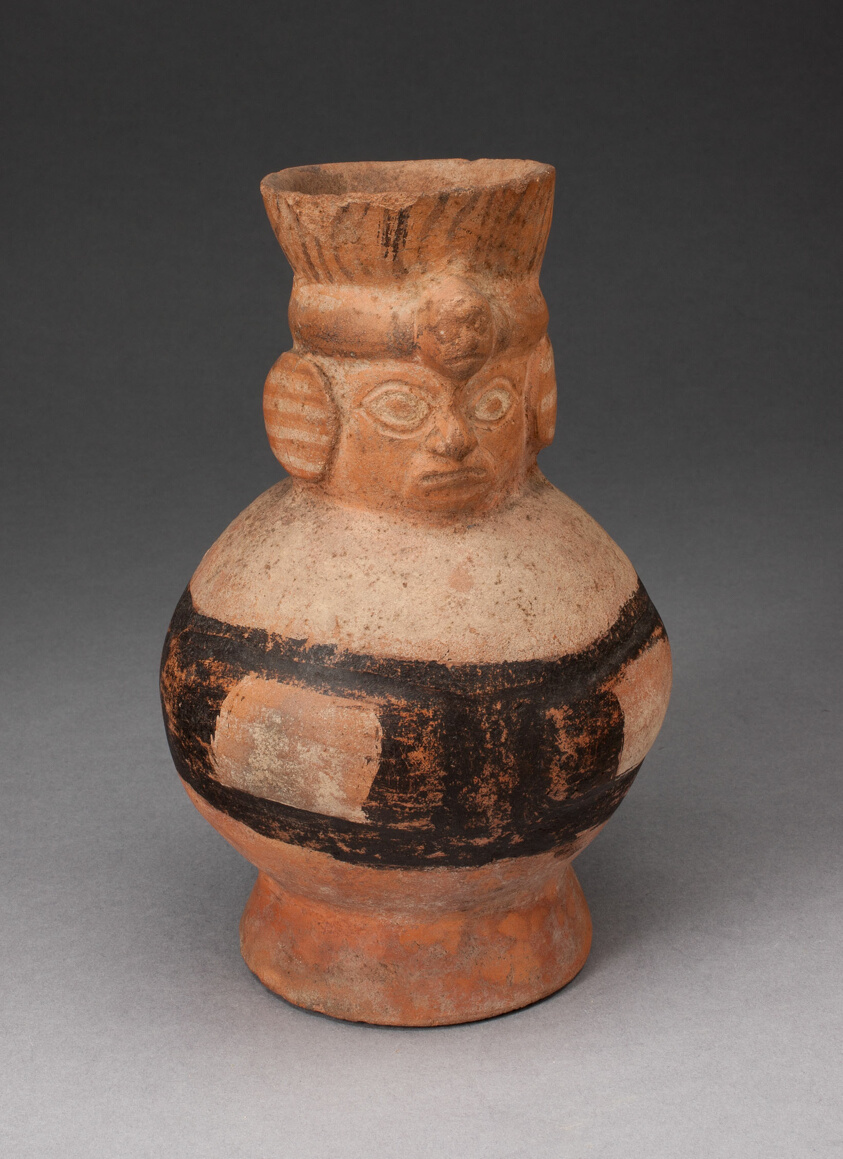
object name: Vessel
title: Jar in the Form of an Abstract Figure with Modeled Head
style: moche, mochica, early intermediate period, Pre-Columbian, americas, Arts of the Americas, andean, andes, south american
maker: Moche (North coast, Peru)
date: 100 BCE–500 CE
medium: Ceramic and pigment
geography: Peruvian North Coast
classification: earthenware; ceramics; vessel; art of the americas